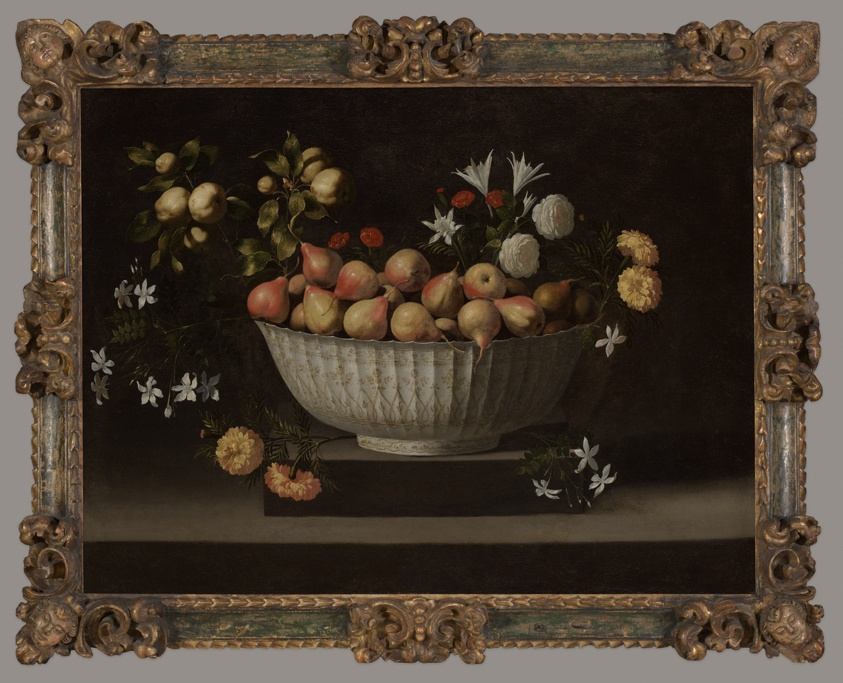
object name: Painting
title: Flowers and Fruit in a Chinese Bowl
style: 17th Century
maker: Juan de Zurbarán (Spanish, 1620–1649)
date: c. 1645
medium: Oil on canvas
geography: Spain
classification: oil on canvas; oil paintings (visual works); paint; spanish; painting; european painting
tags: still life, porcelain, bowl, Chinese, flowers, foliage, fruit, pears